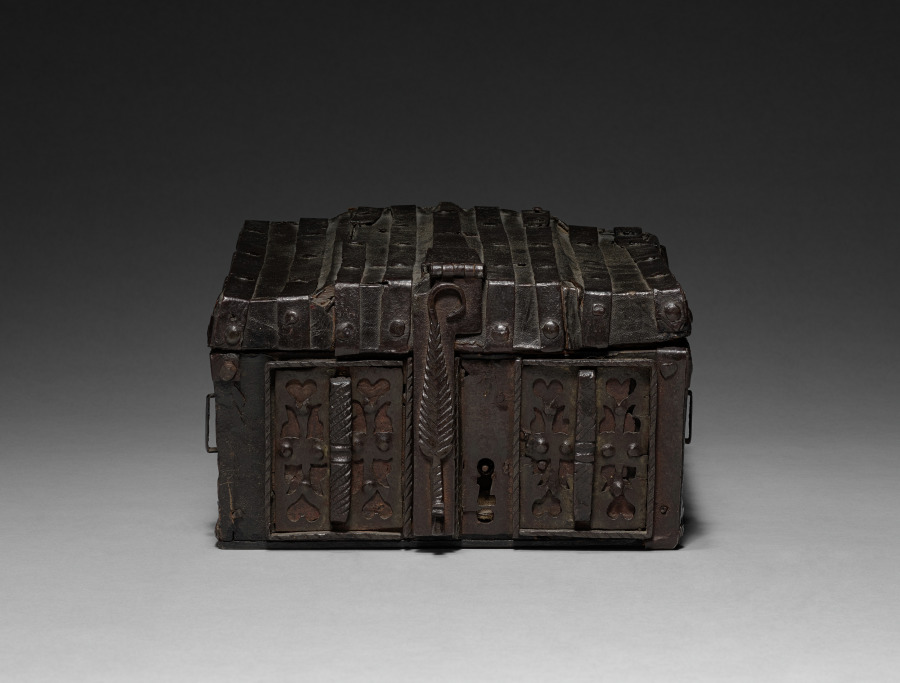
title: Coffret with Woodcut of Saint Veronica's Vernicle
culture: Coffret: France, probably Paris; Woodcut: Germany, Augsburg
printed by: Hans Burgkmair the Elder (German, 1473–1531)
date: Coffret: c. 1515; Woodcut: c. 1509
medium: Wood, leather, iron, textile, woodcut with stenciled coloring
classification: Print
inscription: SALVE. XPI. EFFIGIES. SACERRI[M]A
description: This remarkable object is thought to have functioned as a traveling case to keep small valuables and books, as well as a provisional altar. Made in France around 1515, the interior lid is affixed with a devotional woodcut made in Germany, imported, and colored for the purpose. Featuring an image of the veil of Saint Veronica, the text at the bottom of the woodcut guides the user in prayer to the holy image of Christ’s face which has been miraculously imprinted on the veil, an action that held promise of indulgences (a reduction in one’s punishment for sins). Presumably, the owner carried the box on a journey, retrieved a prayer book from inside, and propped it open in order to practice daily prayers.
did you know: A secret compartment on the top lid of this coffer may have held a relic, consecrated host, or valuable document.